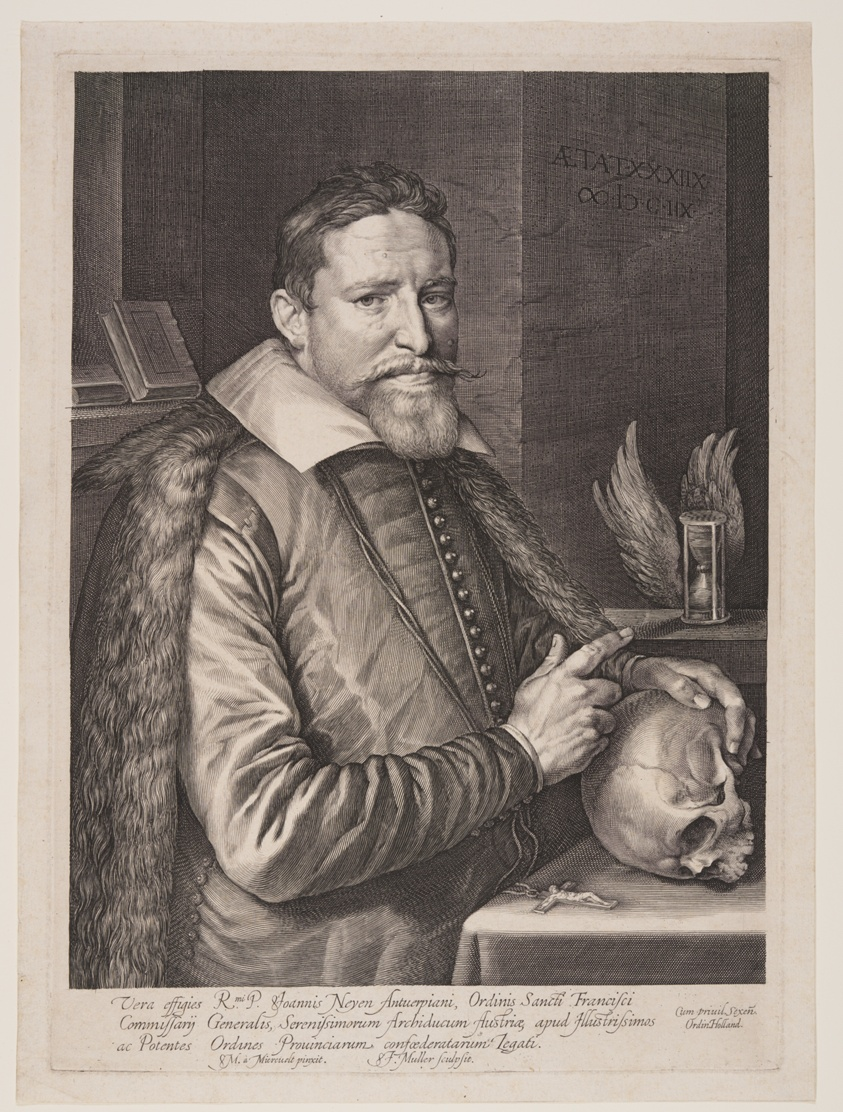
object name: Print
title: Joannes Neyen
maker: Jan Harmensz Muller (Dutch, 1571–1628); after Michiel van Mierevelt (Dutch, 1567-1641)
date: 1608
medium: Engraving on ivory laid paper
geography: Netherlands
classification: print; paper; prints and drawing; engraving